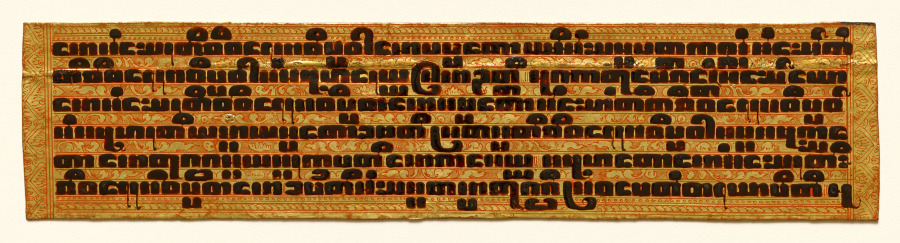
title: Text, folio 10 (recto) from a Kammavacha: Buddhist ordination text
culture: Myanmar (Burma)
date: 1800s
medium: Leaf: lacquer and gilding on cloth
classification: Manuscript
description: In premodern Burma, lay people commissioned lavishly ornamented manuscripts for ceremonial occasions, when officiants would read aloud from the text. Written in black lacquer, the text is in the language of Pali written in a Burmese script. It contains ordination rites and procedures for monastic ceremonies. The second to last page is covered with intricately drawn, winged celestial beings (nats) in gestures of praise. They fly amid intertwining vegetation—denoting bounty—that grows from serpentine forms that refer to rain clouds. Lionlike forms inhabit the space with them. The top and bottom covers are equally ornamented with jeweled floral patterning.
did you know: The Pali text of this manuscript is written in Burmese square script, which is also known as "tamarind seed script."